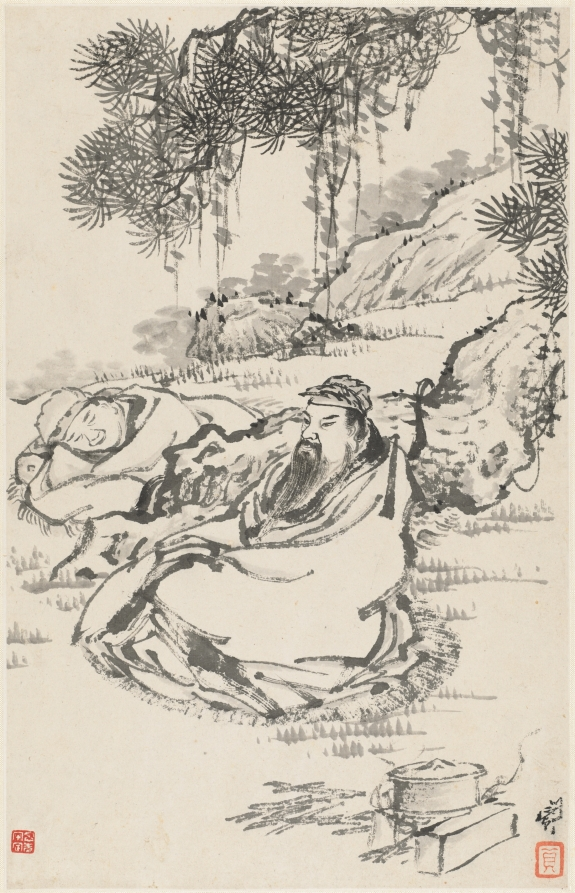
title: Lu Tong and Servant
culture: China, Qing dynasty (1644-1911)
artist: Min Zhen (Chinese, 1730–after 1788)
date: 1788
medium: album leaf, ink on paper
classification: Painting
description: Min Zhen, who was orphaned at age 12 and developed an eccentric personality, was trained by Tang Yin (1682–1756), a writer, playwright, and superintendent of the imperial porcelain workshops in Jingdezhen. The connection to him may have enabled Min to stay in Beijing for a decade from around 1773. It is not clear whether he ever resided in Yangzhou, but his style is in many instances reminiscent of that of Yangzhou artist Huang Shen. This album demonstrates Min’s versatility and mature style in the last years of his life.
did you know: Lu Tong (d. 835) was a Tang dynasty poet and tea aficionado.